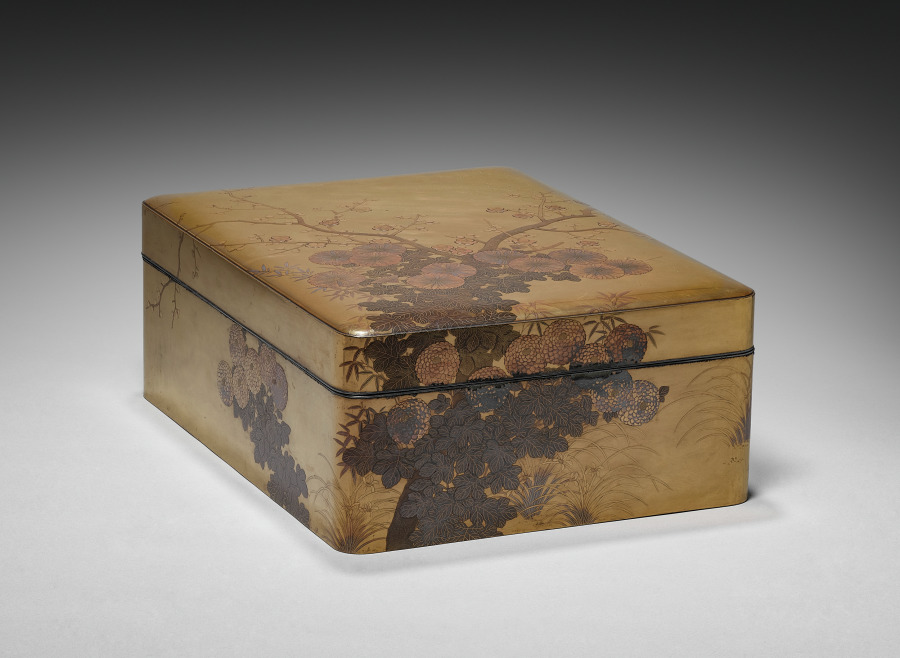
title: Document Box (Ryōshibako) with Chrysanthemum and Plum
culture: Japan, Meiji period (1868–1912)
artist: Sasaki Takayasu (Japanese, 1845–1929)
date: late 1800s-early 1900s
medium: Lacquer over wood with gold and silver sprinkled powder (maki-e)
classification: Lacquer